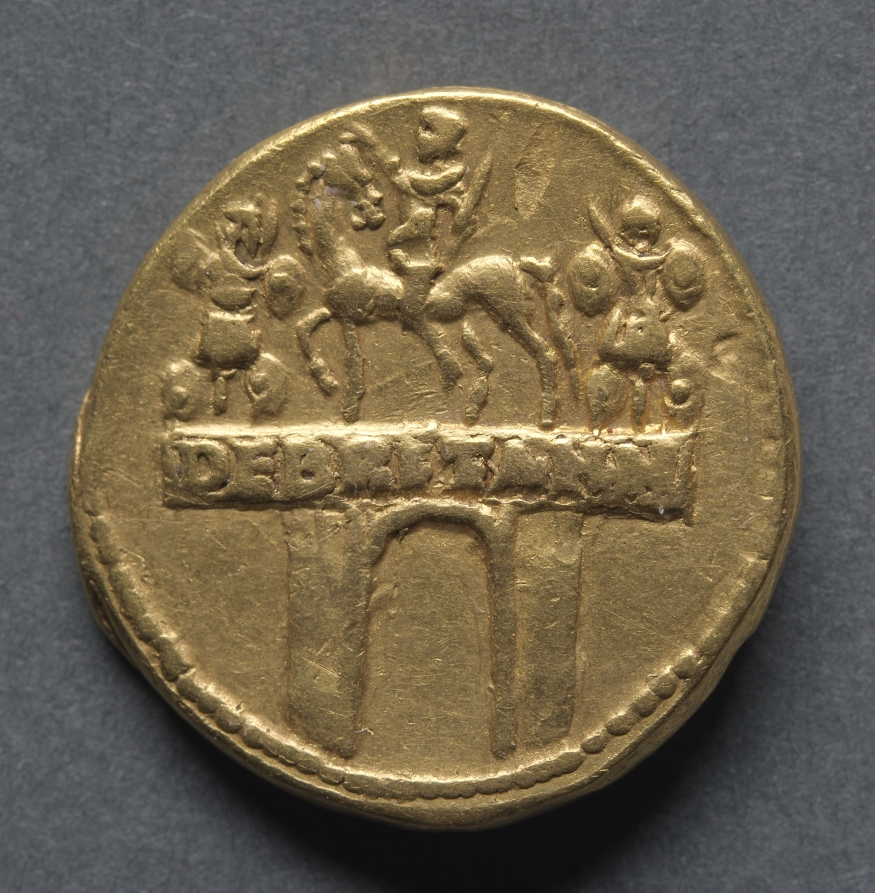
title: Aureus: Triumphal Arch with Equestrian Statue and Trophies (reverse)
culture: England, Roman, Claudius I (41–54 CE)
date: 47–48 CE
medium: gold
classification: Coins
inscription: DE. BRITANN.